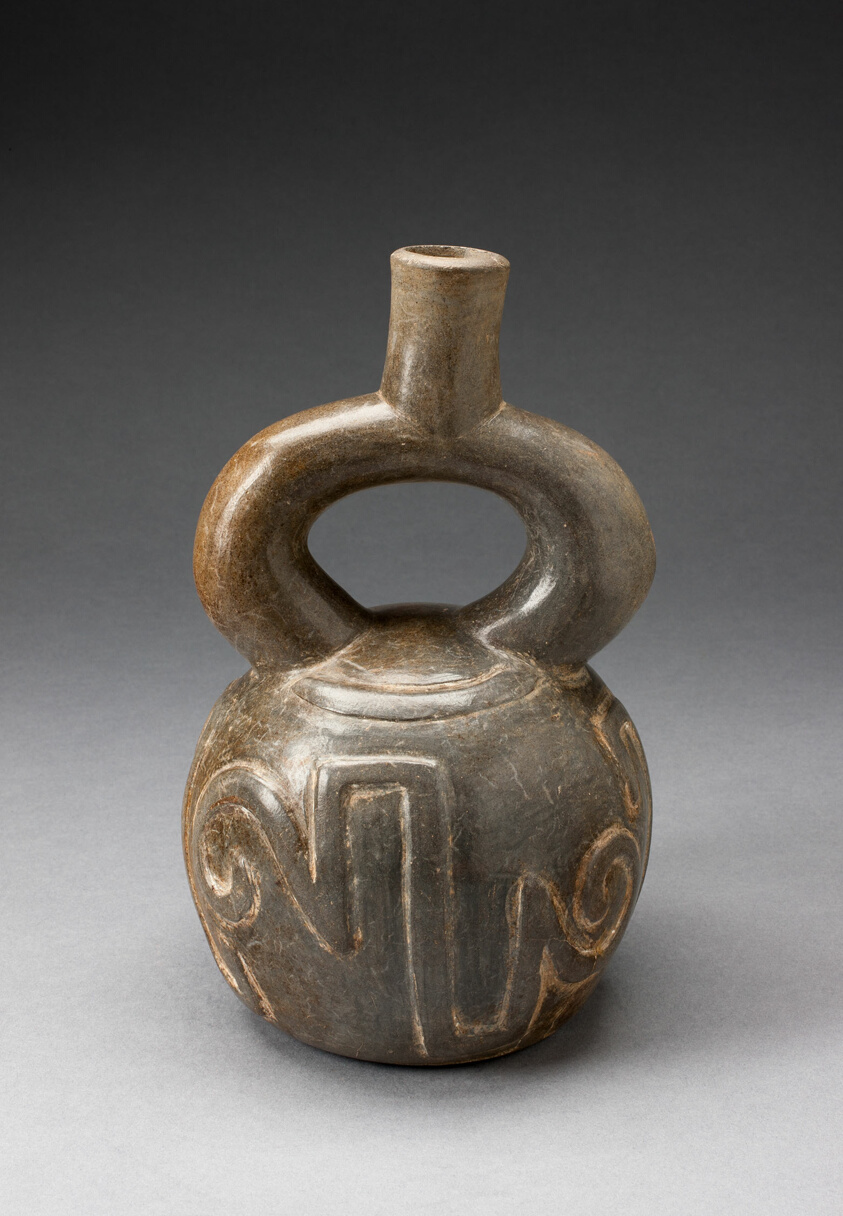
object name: Vessel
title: Stirrup Spout Vessel with Raised Geometric Scroll Motif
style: chavín horizon, early horizon, Pre-Columbian, americas, Arts of the Americas, andean, andes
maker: Chavín (North coast, Peru)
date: c. 500 BCE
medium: Ceramic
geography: Peruvian North Coast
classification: earthenware; ceramics; vessel; art of the americas